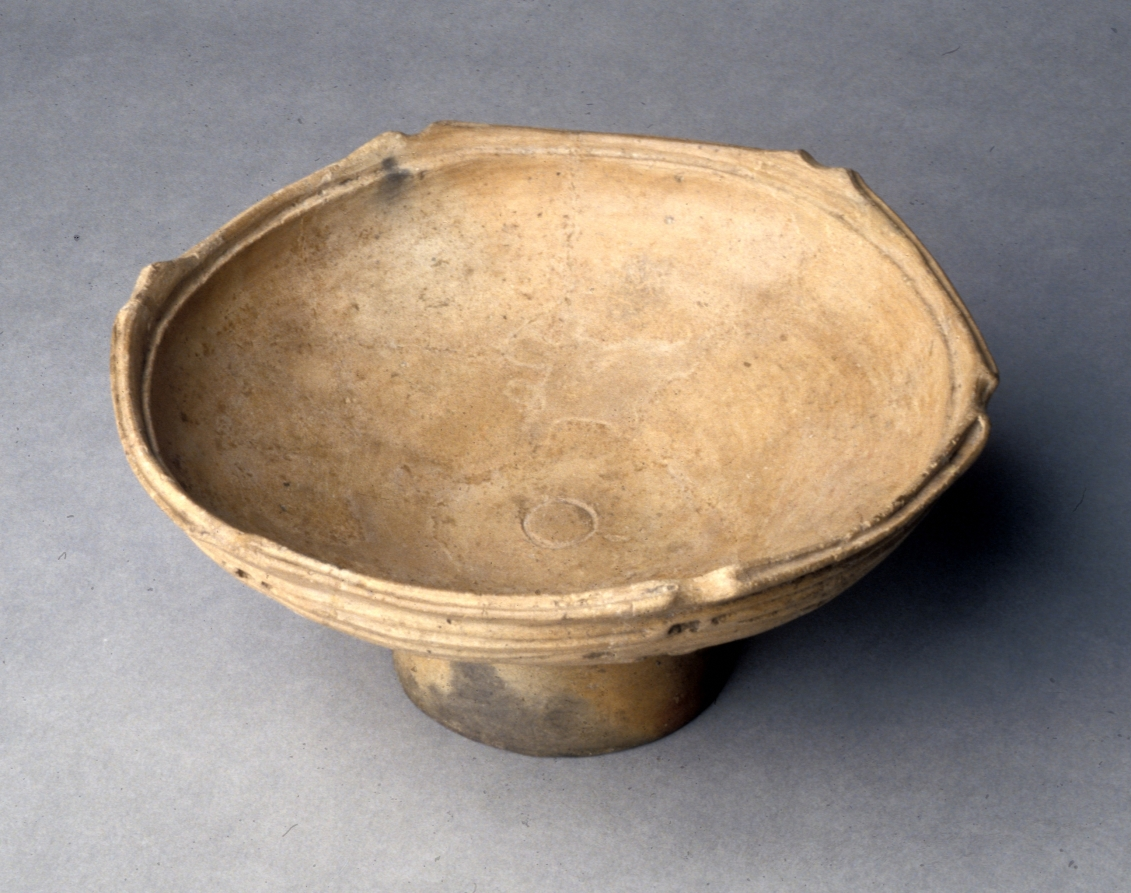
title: Pedestalled Dish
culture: Japan, Jōmon period (c. 10,500–300 BCE)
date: c. 1000–500 BCE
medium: burnished earthenware with carved and impressed decoration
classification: Ceramic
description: The Jomon period (10,500-300 BC) marks the beginning of the Japanese ceramic tradition, one of the most vibrant in world history. Major features such as an emphasis on asymmetrical silhouettes, great attention to surface texture, technological simplicity, and ambivalence to bright color already appear in this era. Late Jomon vessels are typically formed of a dense clay paste, and during this period, smaller serving vessels appear, in contrast to earlier deep storage or cooking vessel shapes. New types of surface decoration-carved rather than impressed into the clay body-herald the arrival of a distinctive aesthetic. The attachment of the pedestal to this shallow bowl, as well as the vessel's rather thin walls, also identify a new stage in ceramic production in Japan.